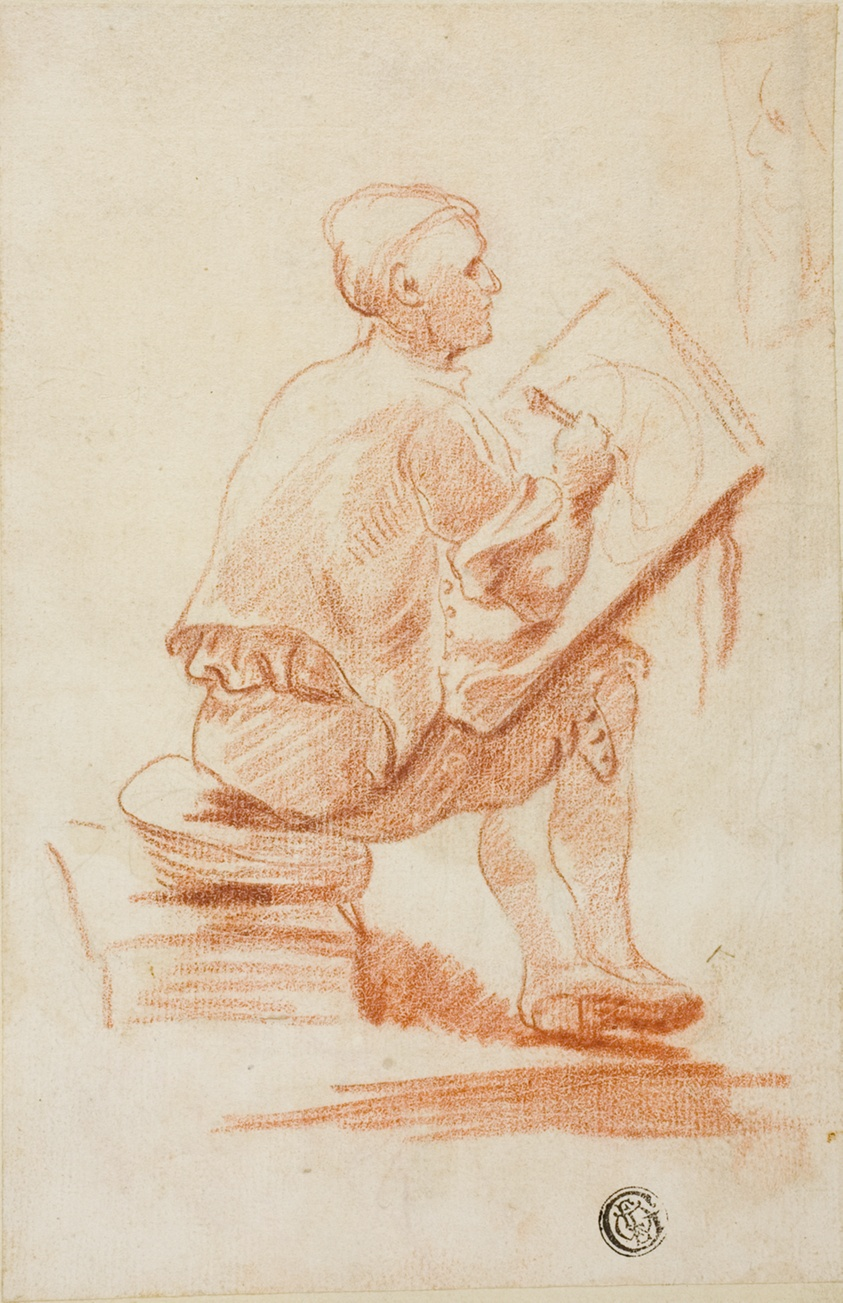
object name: Drawing and Watercolor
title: Man Seated on Stool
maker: Unknown Artist; European, 17th/18th century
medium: Red chalk, on ivory laid paper, laid down on card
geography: Europe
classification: chalk; drawings (visual works); prints and drawing